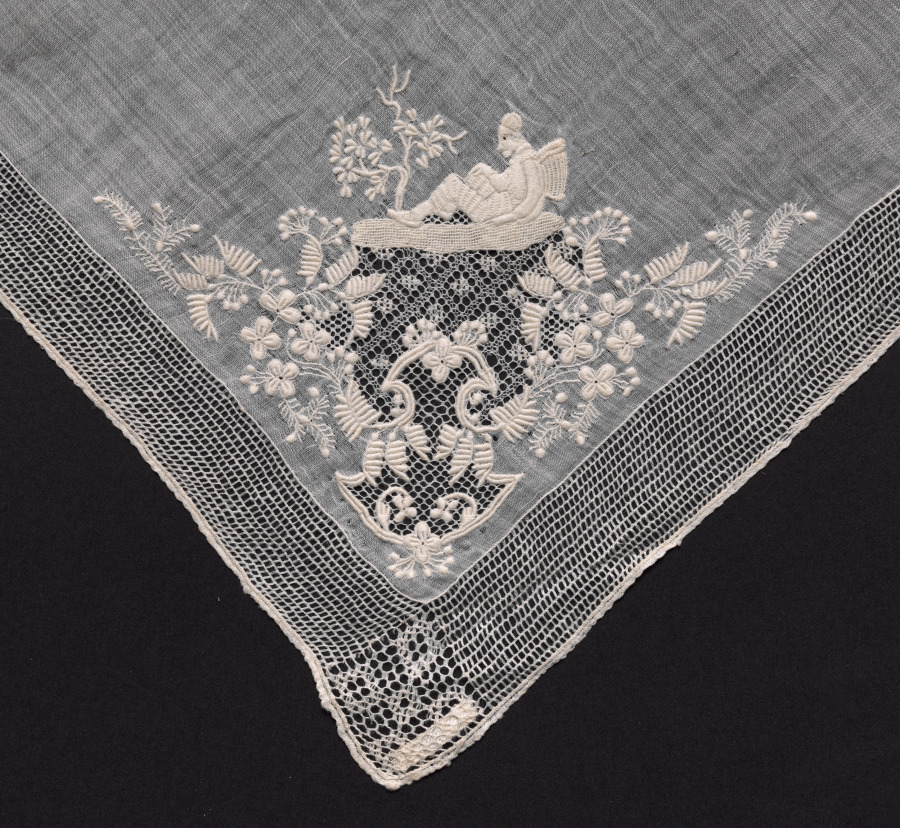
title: Embroidered Handkerchief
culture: Italy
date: 1700s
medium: Plain weave linen with needle lace (drawnwork) and embroidery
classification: Embroidery